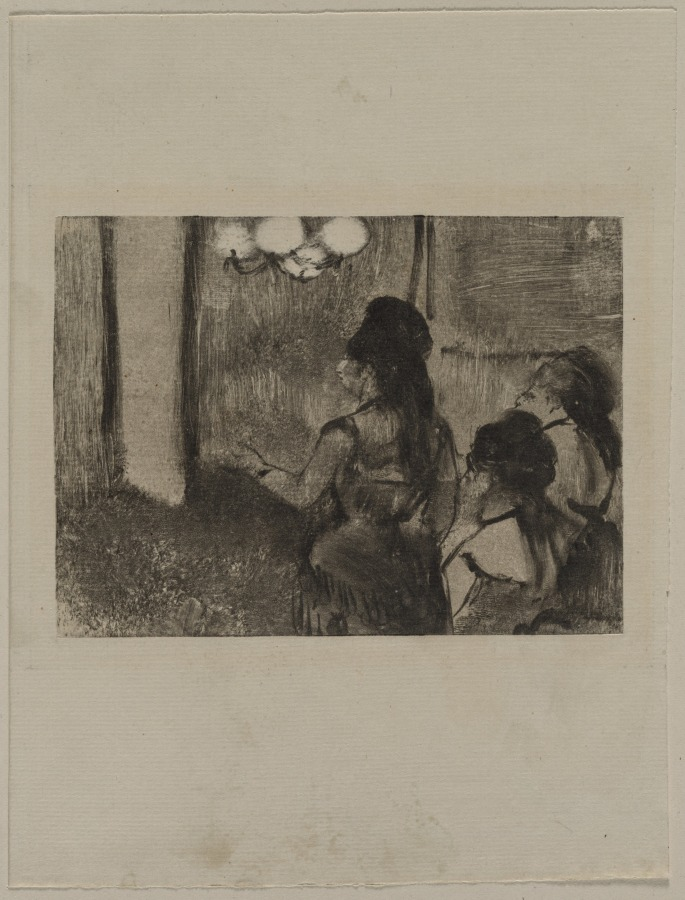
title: In the Salon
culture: France, 19th century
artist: Edgar Degas (French, 1834–1917)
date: c. 1880s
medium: monotype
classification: Print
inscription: Watermark: HALLINES [with fragment of shield]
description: Edgar Degas's series of monotypes depicting brothels depicted a hidden aspect of Parisian life. Degas's interest in the subject paralleled the theme of the prostitute in naturalist novels of the era by Emile Zola and Edmond and Jules de Goncourt, and echoed the then-contemporary debate about the regulation—or abolition—of prostitution in Paris. In this print, three women await their clients under a luminous globed chandelier. A standing figure reaches out her left arm as if to beckon an unseen visitor.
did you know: Edgar Degas's series of brothel monotypes was never exhibited during his lifetime and remained in the privacy of the artist's studio until his death.